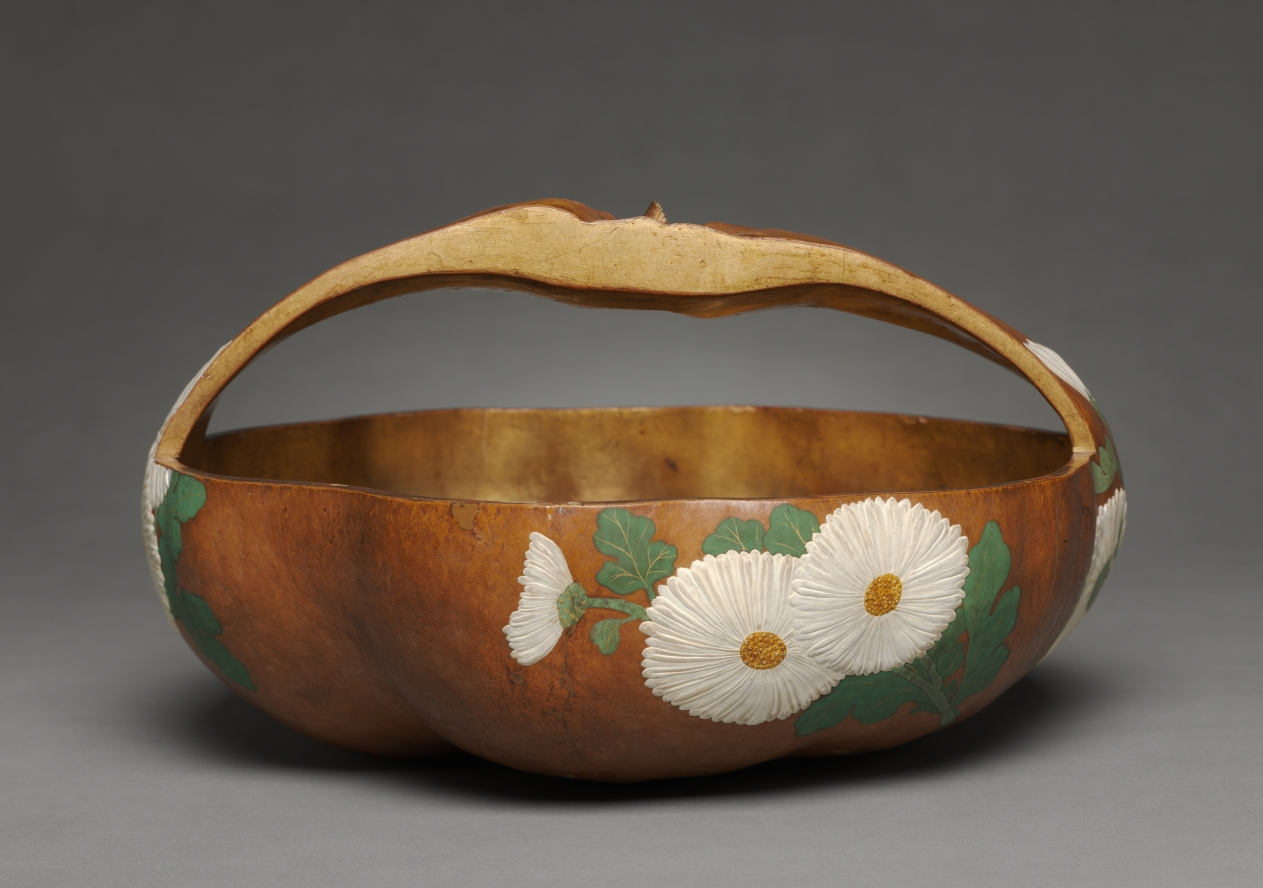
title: Gourd Basket with Chrysanthemum Design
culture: Japan, Edo period (1615–1868)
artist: attributed to Ogata Kōrin (Japanese, 1658–1716)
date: 1700s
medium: gourd; lacquered and painted with gesso, color, and gold pigments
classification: Miscellaneous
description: This very rare basket is made from a carved gourd and inscribed on the bottom with the signature of Ogata Korin (1658– 1716), a painter and lacquerer who founded the Rimpa school. Here, he applied the chrysanthemums with white gesso in relief. This basket is decorated with opaque green paint, and its inside is lined with gold.